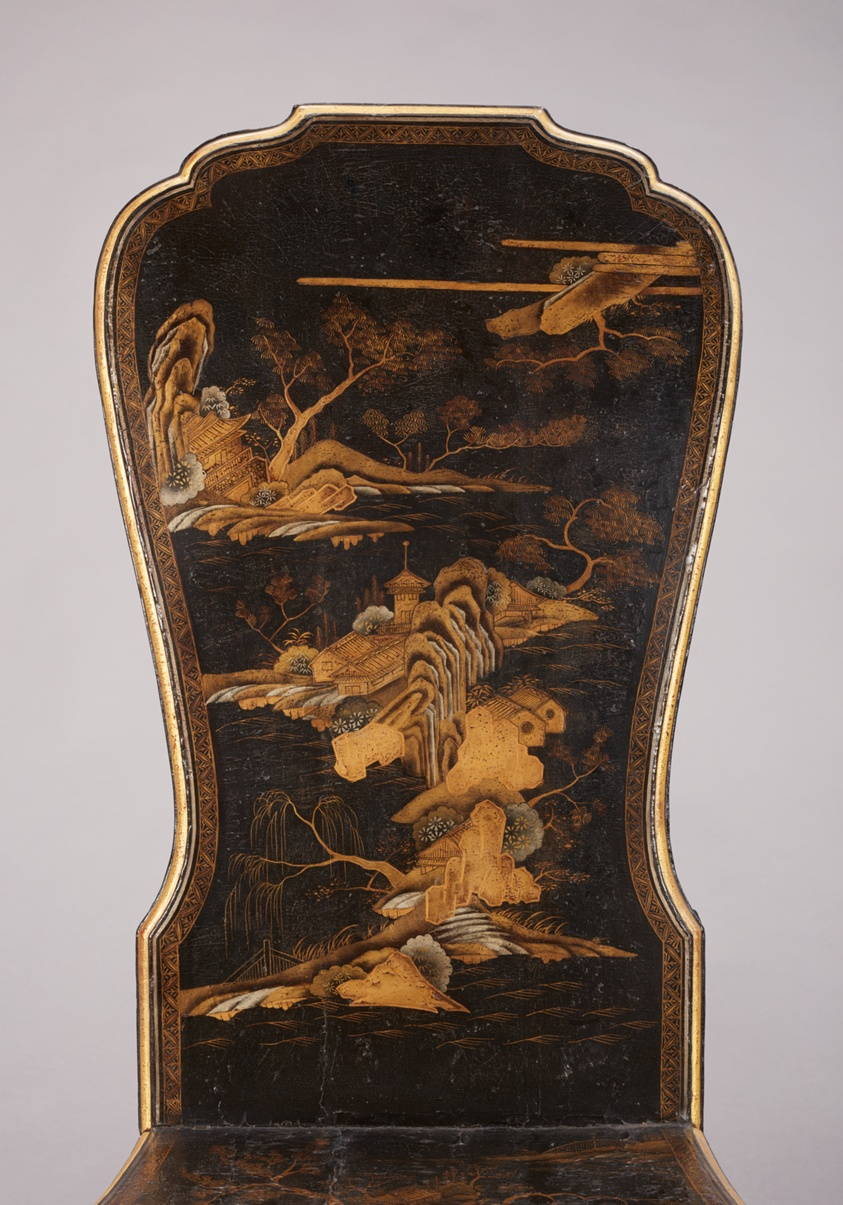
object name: Furniture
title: Pair of Hall Chairs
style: Baroque, chinoiserie, georgian, 18th Century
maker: China (lacquer back and seat panels) and England (frame)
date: 1720-30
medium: Frames: gilt gesso on beechwood; Backs and seats: lacquered and gilt Chinese softwood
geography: England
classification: chair; furniture; seating; european decorative arts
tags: landscapes, rocks